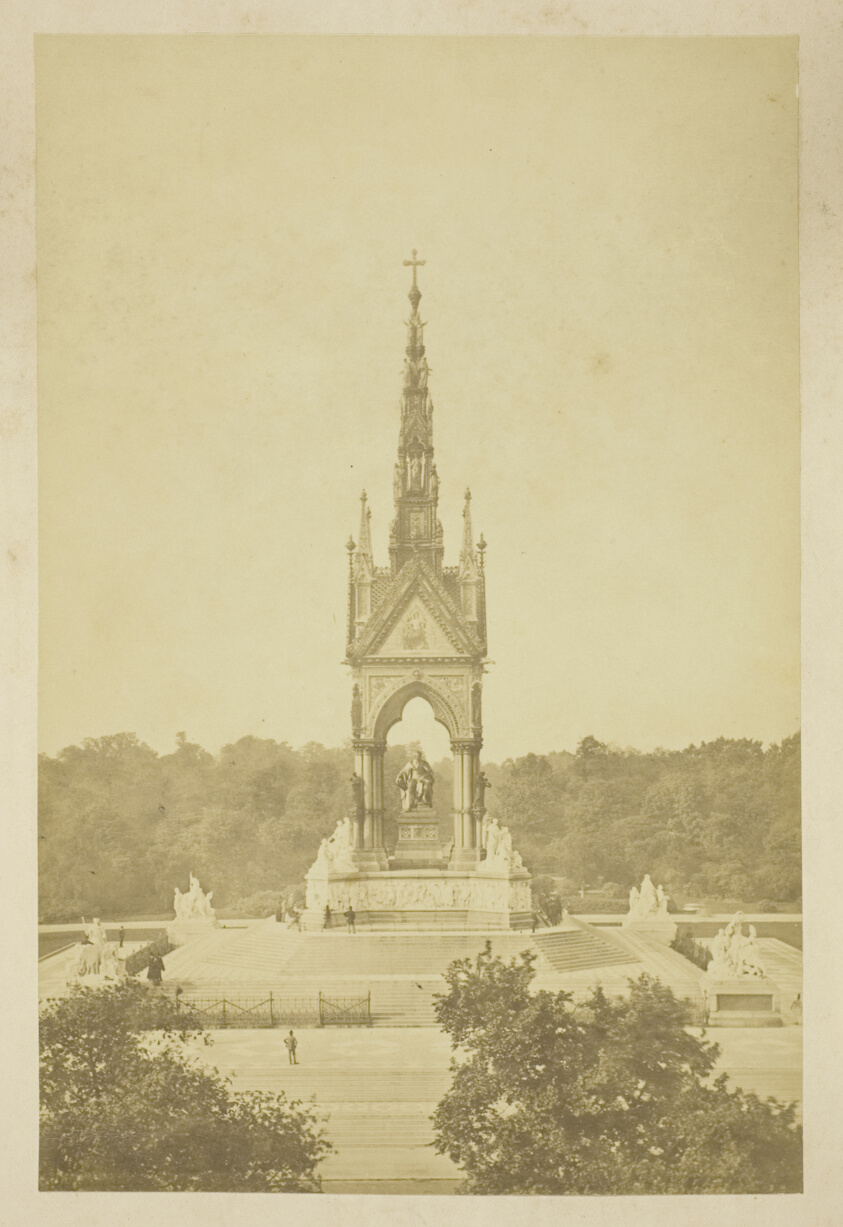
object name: Photograph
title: Albert Memorial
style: 19th century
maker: Artist unknown; probably English, 19th century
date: 1850–1900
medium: Albumen print, from the album "Views of London"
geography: England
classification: albumen silver print; photographic process; photography; photograph